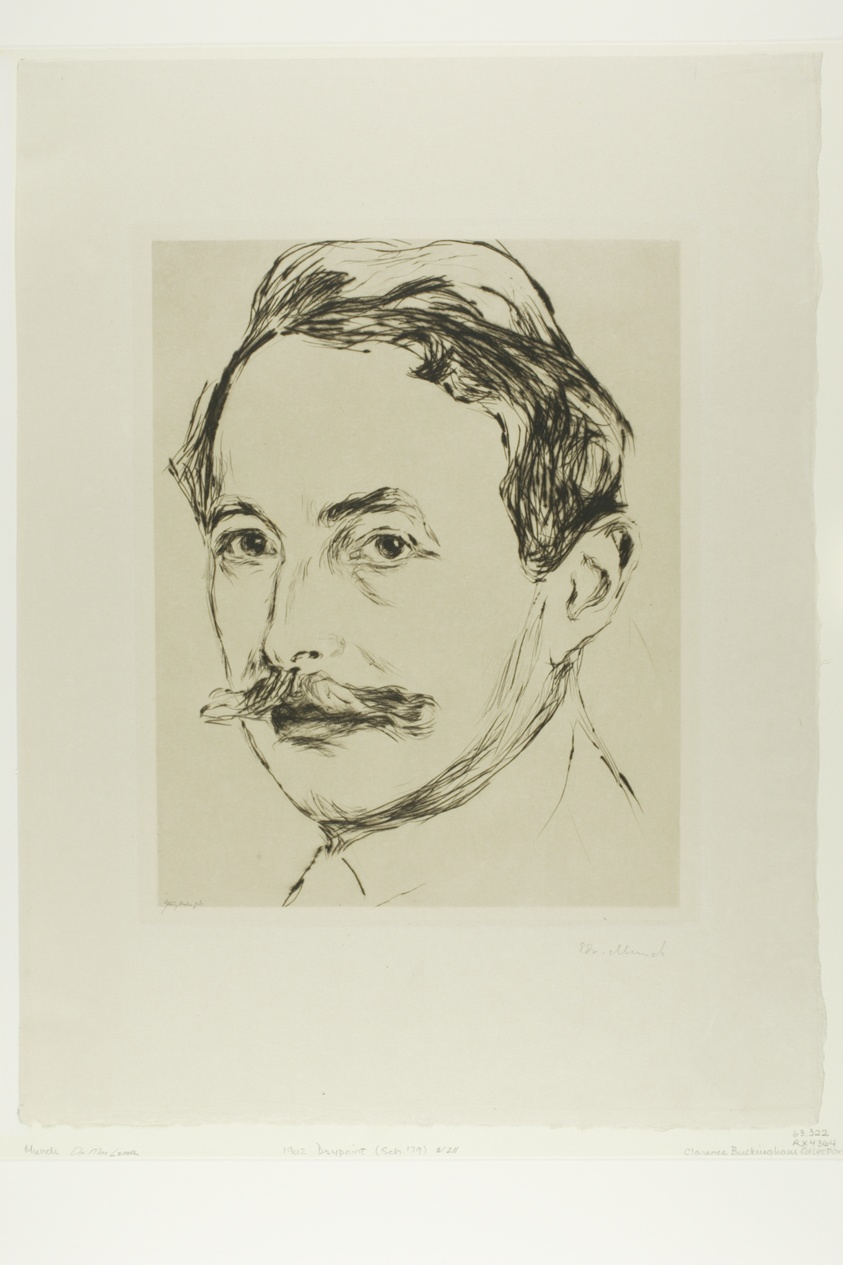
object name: Print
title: Dr. Max Linde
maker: Edvard Munch (Norwegian, 1863-1944)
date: 1902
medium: Drypoint on cream wove paper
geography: Norway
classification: drypoint; print; prints and drawing